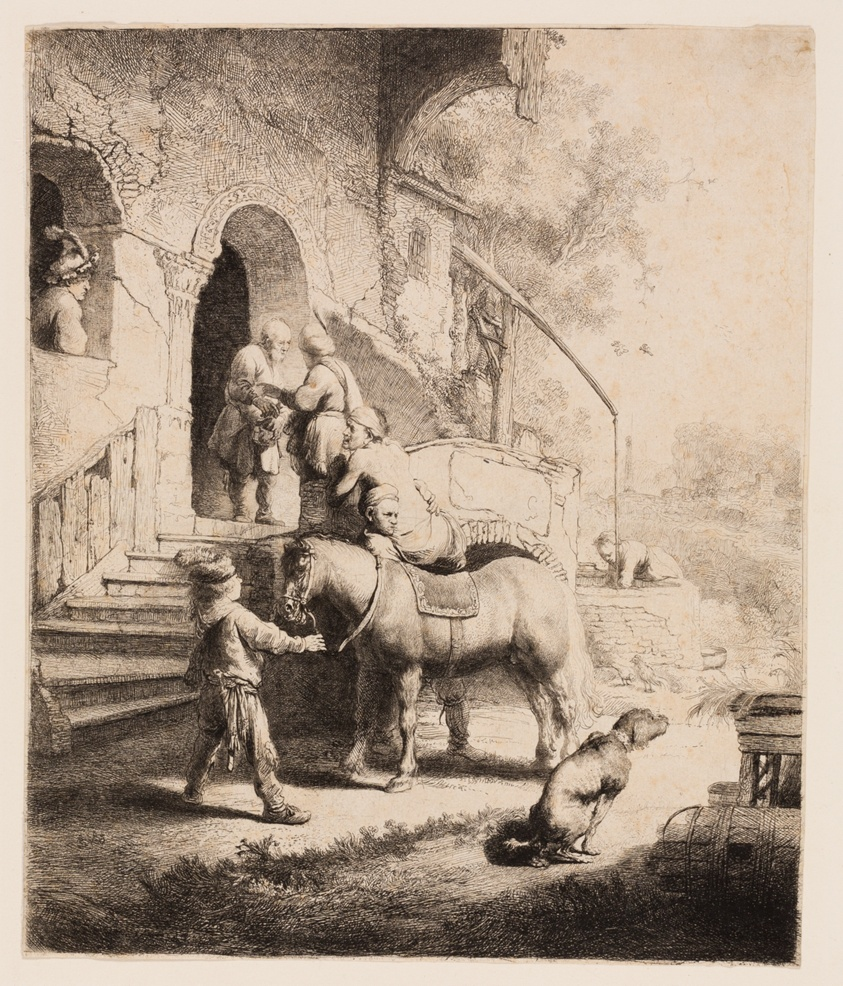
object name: Print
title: The Good Samaritan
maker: Rembrandt van Rijn (Dutch, 1606-1669)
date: 1633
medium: Etching and burin on ivory laid paper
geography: Holland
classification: etching; print; prints and drawing; paper; burin